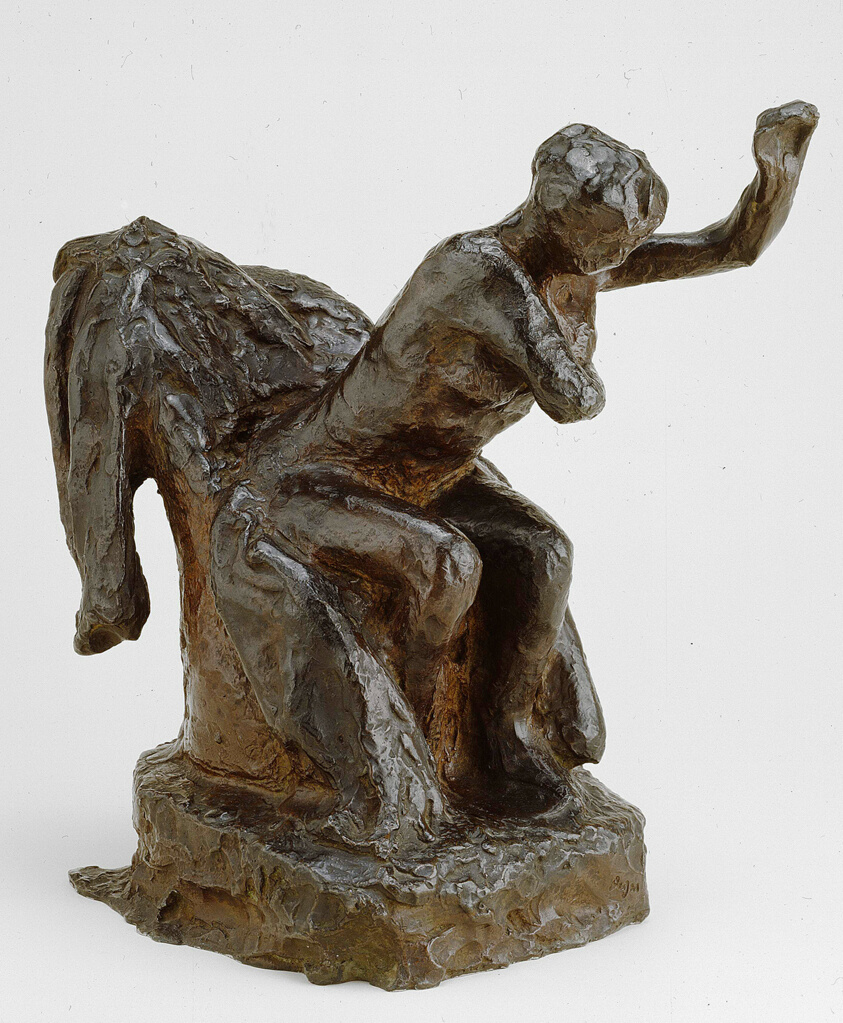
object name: Sculpture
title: Woman Seated in an Armchair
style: Impressionism, nineteenth century, 19th century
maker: Edgar Degas (French, 1834–1917)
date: Modeled c. 1903; cast 1919/21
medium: Bronze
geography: France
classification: statuette; figure; french; sculpture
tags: women, woman, nudes, chains, everyday life (genre)